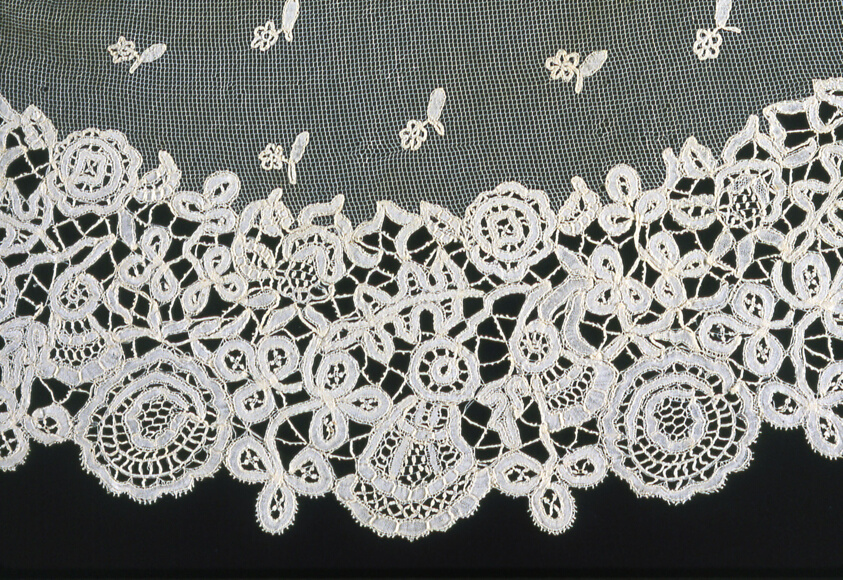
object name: Costume and Accessories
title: Collar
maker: England, Honiton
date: 1875/1900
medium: Cotton, machine net; appliquéd with cotton, bobbin part lace; edged with cotton and linen, bobbin part lace of a type known as "Honiton"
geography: England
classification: costume accessory; lace - mixed; textile; costume; costume accessory - headdress; costume accessory worn above the waist